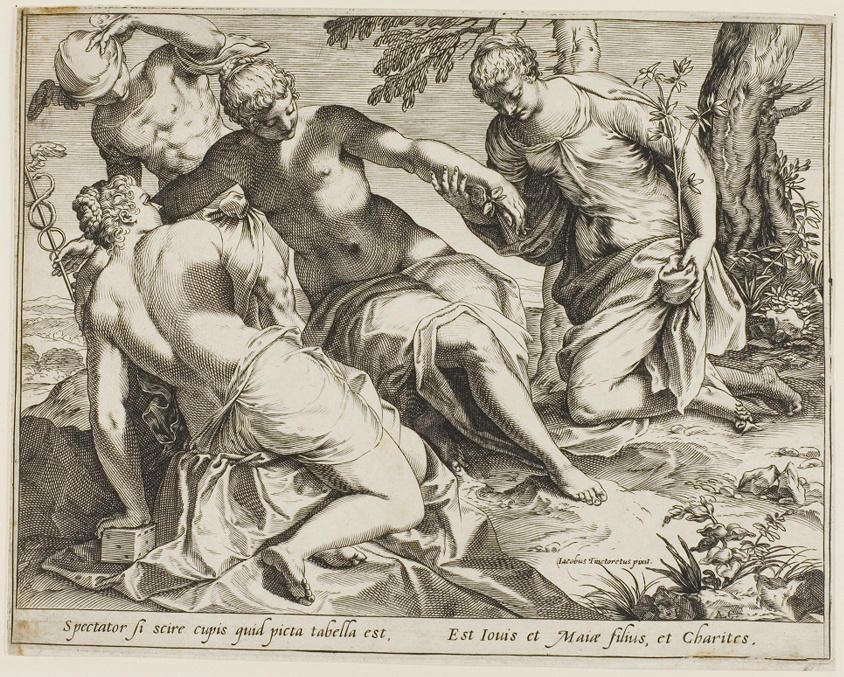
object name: Print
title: Mercury and the Graces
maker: Agostino Carracci (Italian, 1557-1602); after Jacopo Robusti, called Tintoretto (Italian, 1519-1594)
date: 1589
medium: Engraving with etching in black ink on ivory laid paper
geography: Italy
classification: print; prints and drawing